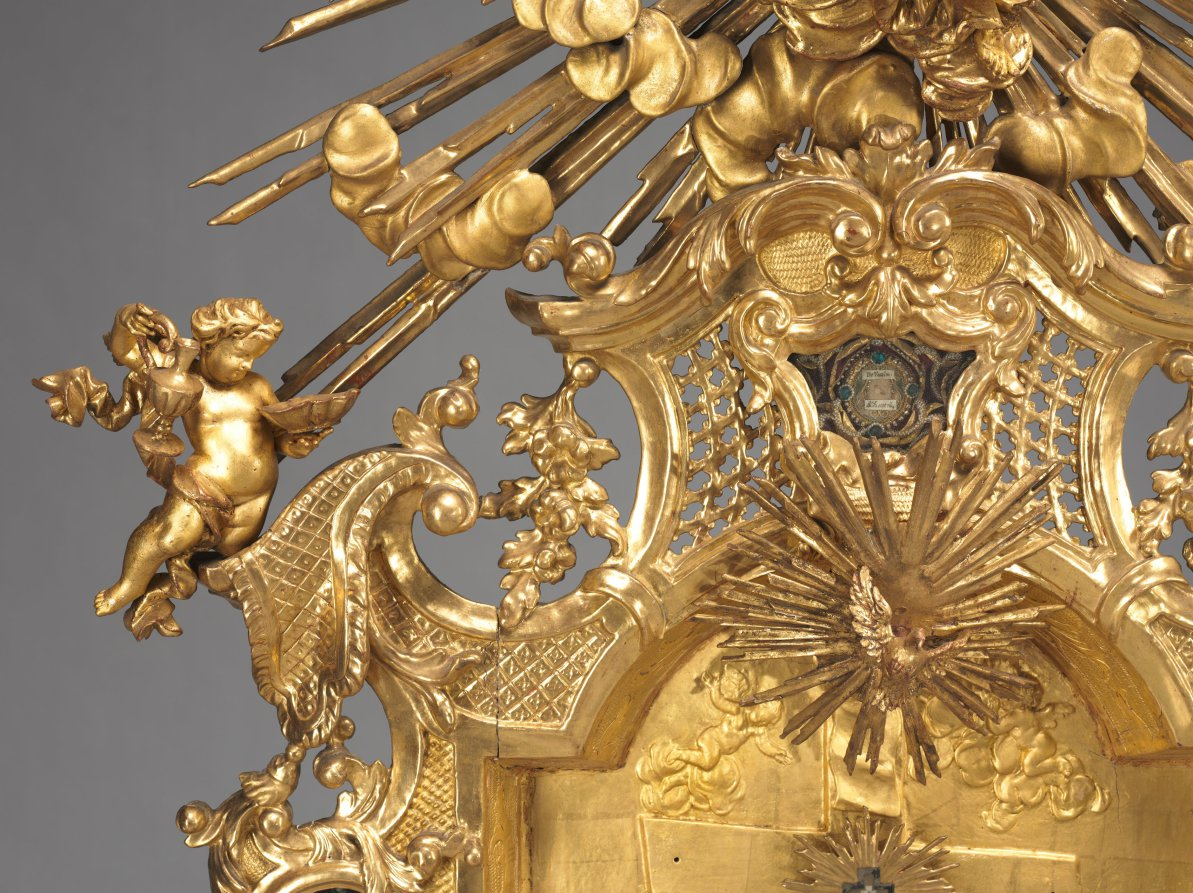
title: Altarpiece with Relics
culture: Germany, Bavaria, 18th century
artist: Joseph Matthias Götz (German, 1696–1760)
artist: and Workshop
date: c. 1735–40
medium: gilded wood, with relics in niches: gilded wood, mother-of-pearl, ebony, red silk, gold wire, seed pearls, rock crystal, pen and ink on paper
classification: Sculpture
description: Götz covers every surface in gold leaf, giving each part of the object equal importance, rather than simply framing a central picture. In this distinctively Central European approach, figural narrative is subordinate to the overall ensemble. Götz designed this object to rest on top of an altar, probably in front of a larger painted or sculpted decorative scheme. The work contains relics seen through the small windows on the perimeter. These small remains of holy figures demonstrate the persistence of a medieval Catholic tradition well into the 1700s.